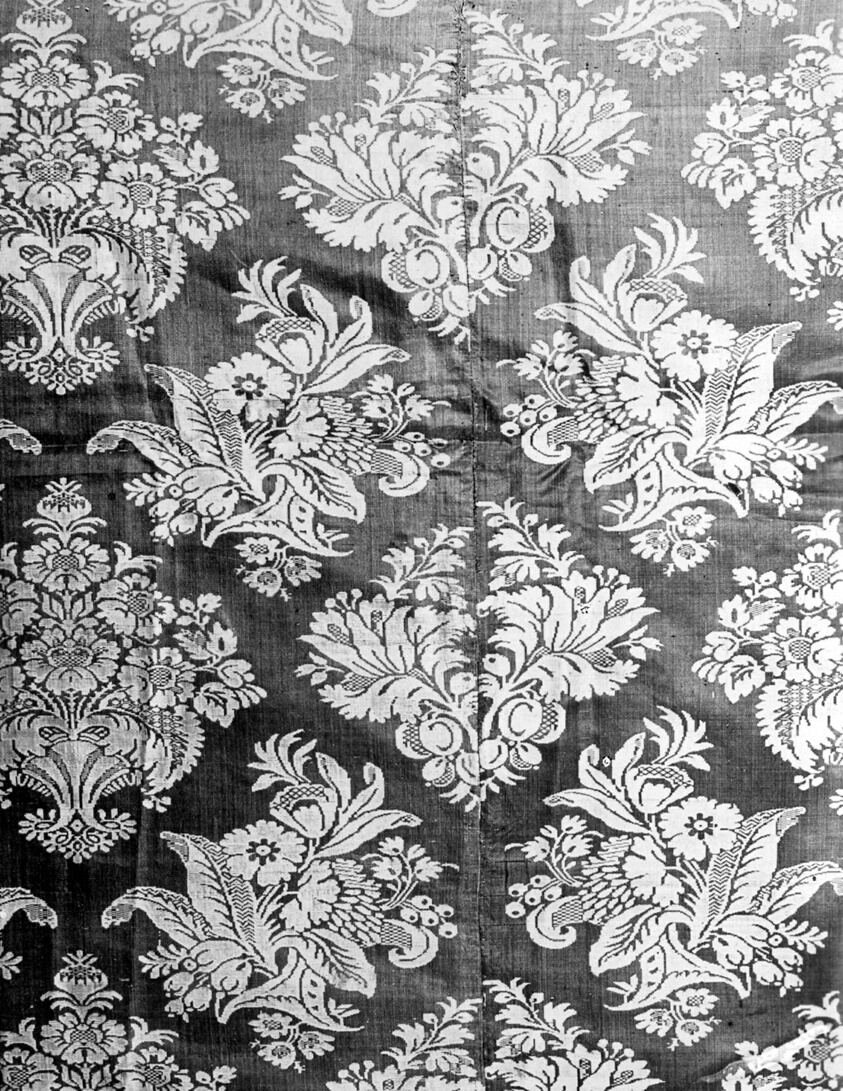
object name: Textile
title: Two Fragments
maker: France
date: 18th century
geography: France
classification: textile; weaving